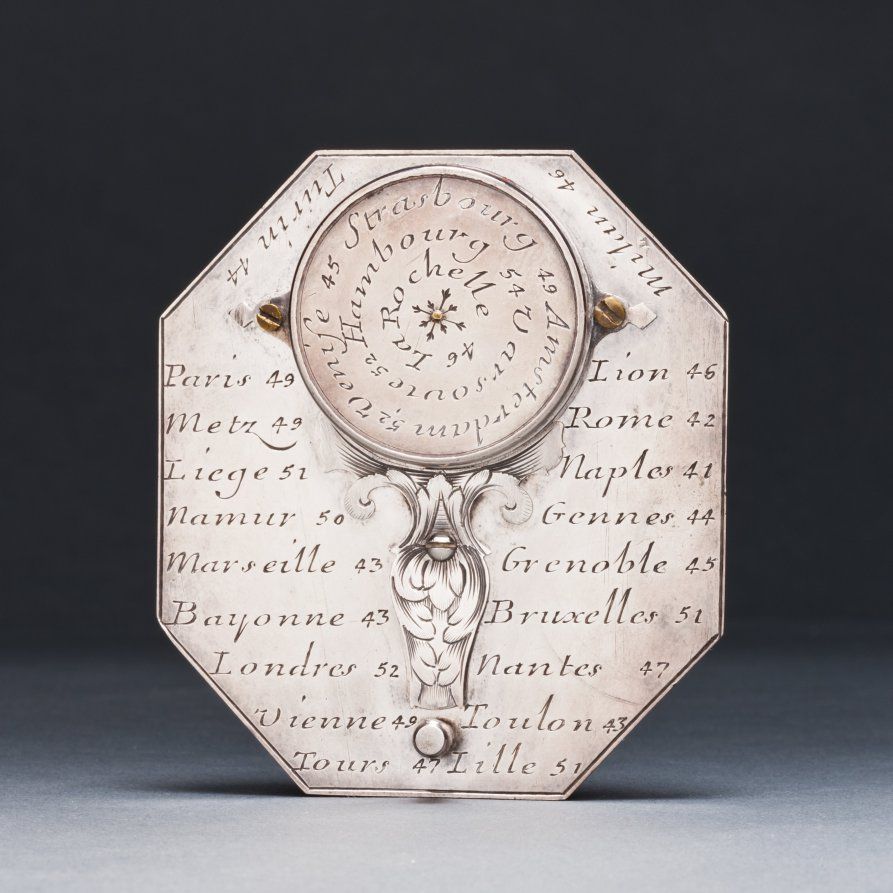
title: Butterfield Sundial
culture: France, 18th century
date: 1700s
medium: silver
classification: Silver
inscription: [Engraved signature above the compass in ribbon band]: "N. BION A Paris"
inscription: [Engraved on the face of the sundial]: “Pour 55° 4-5-6-7-8-9-10-11 50° IIII-V-VI-VII-VIII-IX-X-XI 45° 5-6-7-8-9-10-11 40° -VI-VII-VIII-IX-X-XI'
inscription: [Engraved on the other side]: "Pour 55° -8-7-6-5-4-3-2-1-0 50°-VIII-VII-VI-V-IIII-III-II-I 45°-8-7-6-5-4-3-2-1 40°-VII-VI-V-IIII-III-II-I"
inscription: [Engraved around the compass]: “NORD-OUEST-SUD-EST”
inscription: [Engraved on the back of the sundial]: “Turin 44 Milan 46 Paris 49 Lion 46 Metz 49 Rome 42 Liege 51 Naples 44 Namur 50 Gennes 44 Marseille 43 Grenoble 45 Bayonne 43 Bruxelle 51 Londres 52 Nantes 47 Vienne 48 Toulon 43 Tours 47 Lille 51”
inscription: [Engraved around the back of the compass]: “Venise 45 Strasbourg 49 Amsterdam 52 Hambourg 54 Varsovie 52 La Rochelle 46”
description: Butterfield-type sundials are characterized by their adjustable gnomons, metal flaps that cast a shadow on the dial’s face to indicate the hour, and geographical indices. This sundial has a scale adjustable between latitudes of 40° to 60° north. The latitudes of 26 European towns are engraved on its back for quick reference. With an intricately engraved silver face, it would have functioned as a fashionable traveler’s accessory.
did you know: Butterfield-style sundials were named after Micheal Butterfield, an English scientific and mathematical instrument maker who worked in Paris between 1674 and 1724.